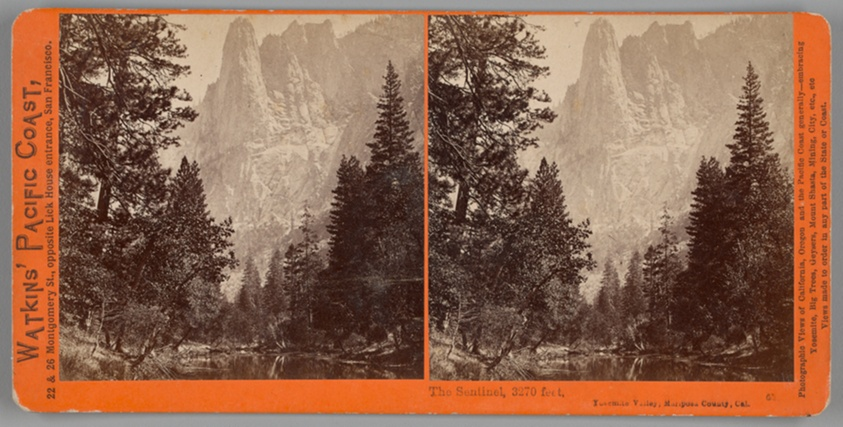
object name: Photograph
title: The Sentinel, 3270 feet, Yosemite Valley, Mariposa County, Cal., No. 65 from the series "Watkins' Pacific Coast"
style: 19th century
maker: Carleton E. Watkins; American, 1829-1916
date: 1861/76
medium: Albumen print, stereo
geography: United States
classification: stereograph (albumen); albumen silver print; photographic process; photography; photograph